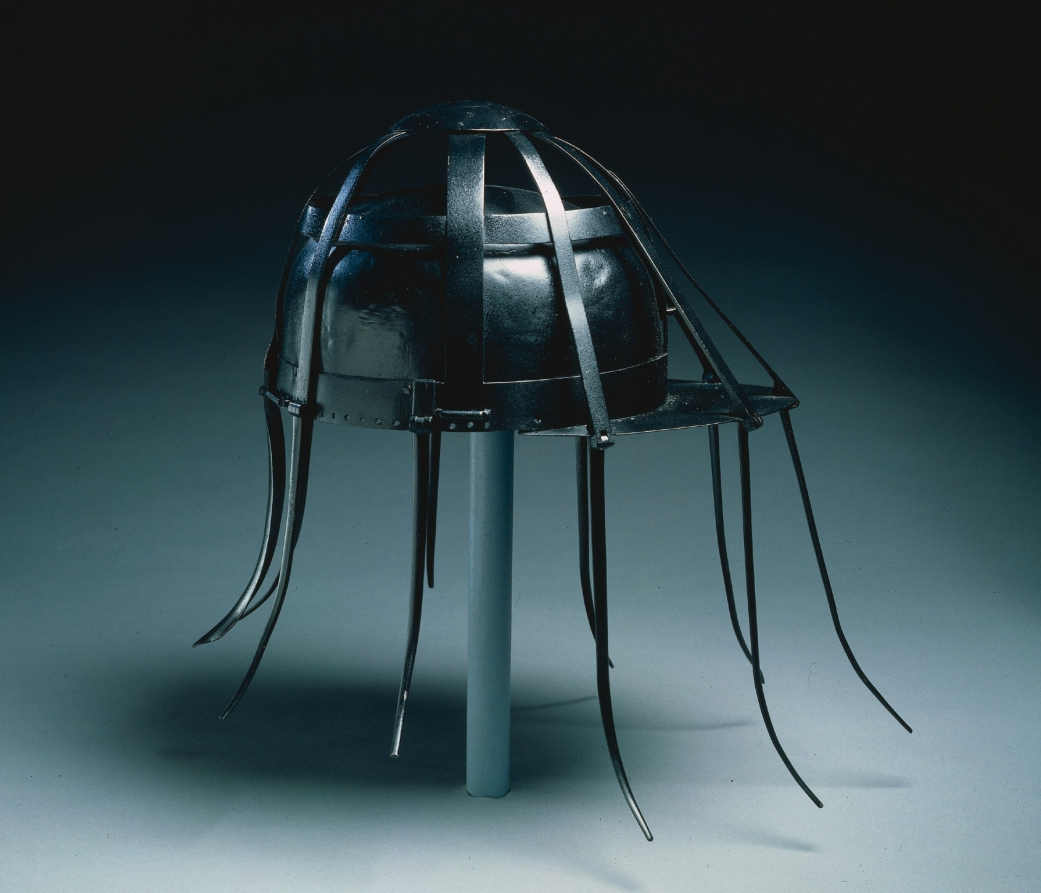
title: Cavalry Spider Helmet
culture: France, 17th century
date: 1600s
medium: iron with black paint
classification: Arms and Armor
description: The "spider-like" legs of this helmet protected the mounted soldier's face and head from slashing sword blows. The legs could be raised and locked up out of the way when not required.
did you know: This helmet was made specifically for use in the field by the light cavalry who wore only a half suit of armor, sturdy riding boots, and an open helmet.